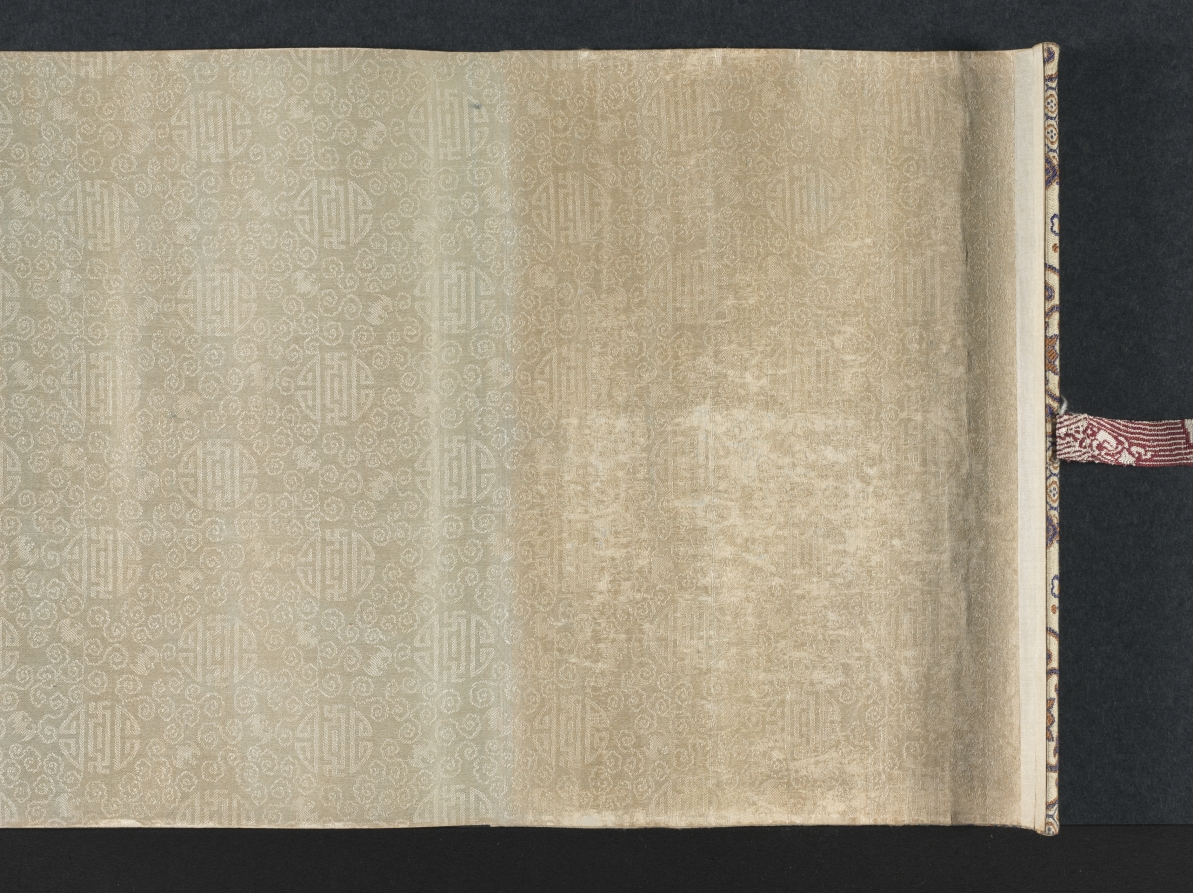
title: Saying Farewell at Xunyang (Song of the Pipa)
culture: China, Ming dynasty (1368–1644)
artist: Wen Boren (Chinese, 1502–1575)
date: 1500s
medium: handscroll, ink and color on paper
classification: Painting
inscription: "潯陽送客圖" 五峰山人文伯仁寫于停雲館中 [印] 文伯仁; 五峰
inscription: 2 colophons and 9 additional seals: 1 transcription of "Pipa xing 琵琶行” (Song of Pipa) and 3 seals of Zhu Yizun 朱彜尊 (1629-1709); 2 seals of Wu Rongguang 吳榮光 (1773-1843); 1 colophon, dated 1826, and 3 seals of Wu Xijia 吳錫嘉 (mid-1700s)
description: This handscroll depicts The Song of the Pipa, a poem by Bai Juyi 白居易 (772–846) written after the poet’s encounter with a pipa player on the Yangzi River. Expelled from her home city when her beauty and fame had faded, she played for the poet at night. Her musical performance and tragic life story resonated with Bai Juyi, who had just been demoted and exiled from life at court himself. The hazy, vast view and pale color tonalities of this painting illustrate these feelings of endless sadness, having lost one’s sense of purpose in life.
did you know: Wen Boren depicted the chilly autumn water with a fishnet pattern.